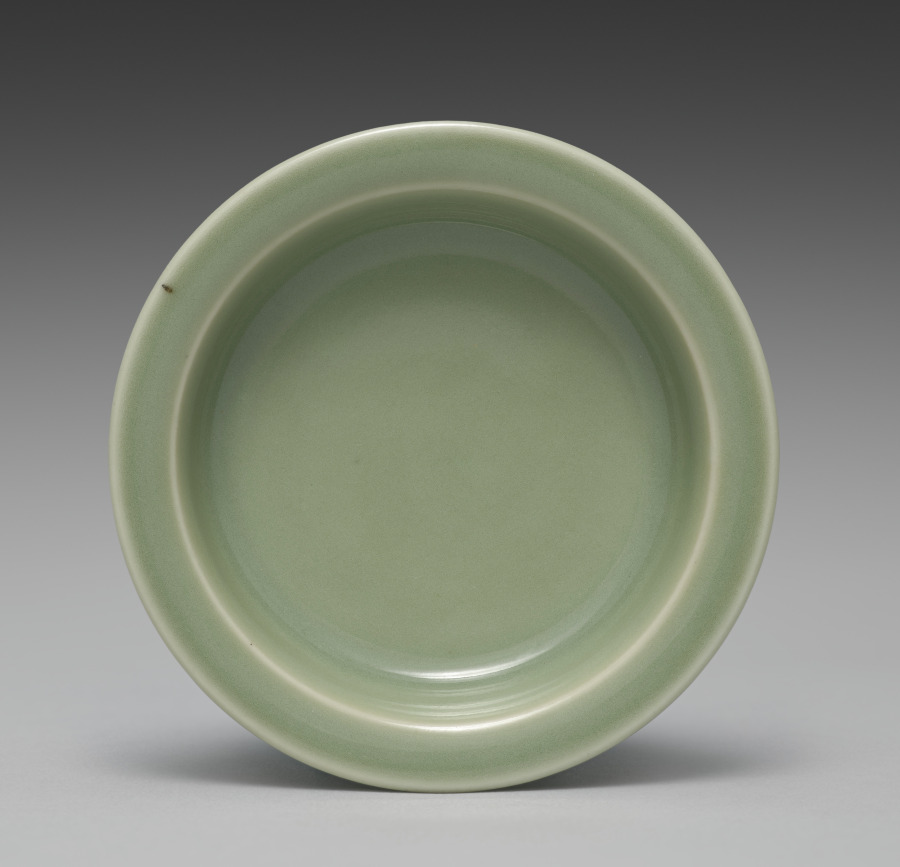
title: Saucer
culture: Japan, Meiji period (1868–1912)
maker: Seifū Yohei III (Japanese, 1851–1914)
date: 1893–1914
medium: One from a set of ten dishes; porcelain with green glaze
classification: Ceramic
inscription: 清風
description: Yohei III’s main output for his sophisticated clientele was in the form of tea sets and dining sets. He created a range of dishes in green glazes. He often produced in pairs, sets of five, or sets of ten. For this set of ten small dishes in a simple, round form that emphasizes the glaze above all, the box lid designates the piece as seiji, or green-glazed porcelain, using a general term for the extensive palette of green glazes often called celadon in English. The box lid further identifies the dishes themselves as tōchō, literally “bean-sized saucers,” a size that makes them suitable for dipping sauces.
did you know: The ten dishes in this set are stored in stacks of five in a two-compartment box.